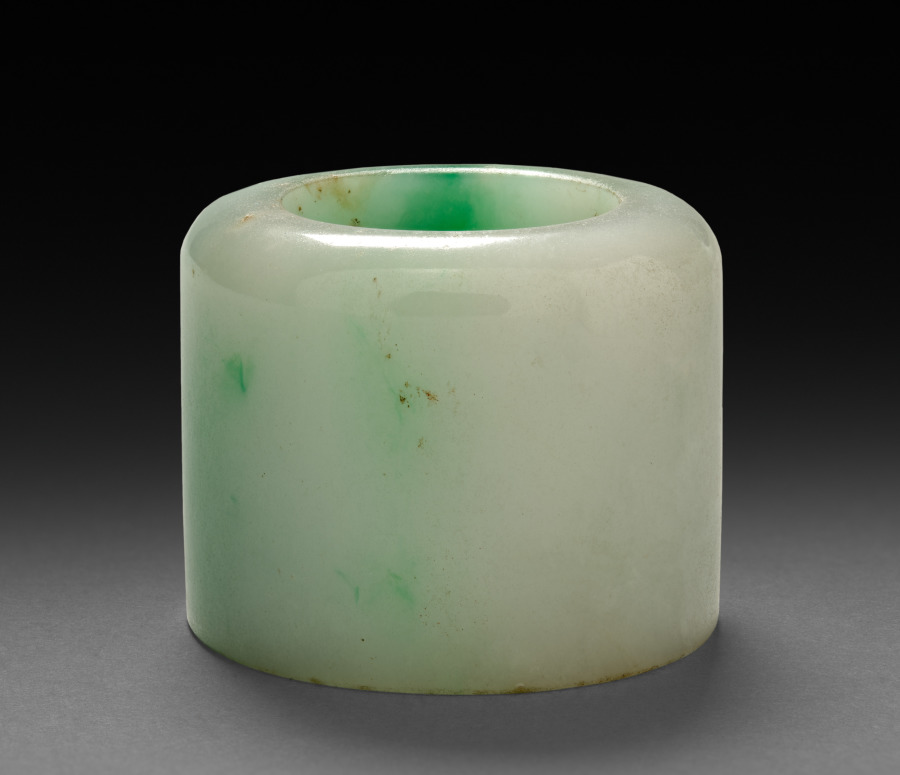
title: Thumb Ring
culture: China, Qing dynasty (1644-1911) or Republican period (1912-49)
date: 1800s–1900s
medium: green and white jade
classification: Jewelry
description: Jade rings were worn by men on the thumb of the right hand to assist with holding and pulling the string of the archer’s bow. However, thumb rings were also fashionable accessories for civil officials in the late Qing dynasty.